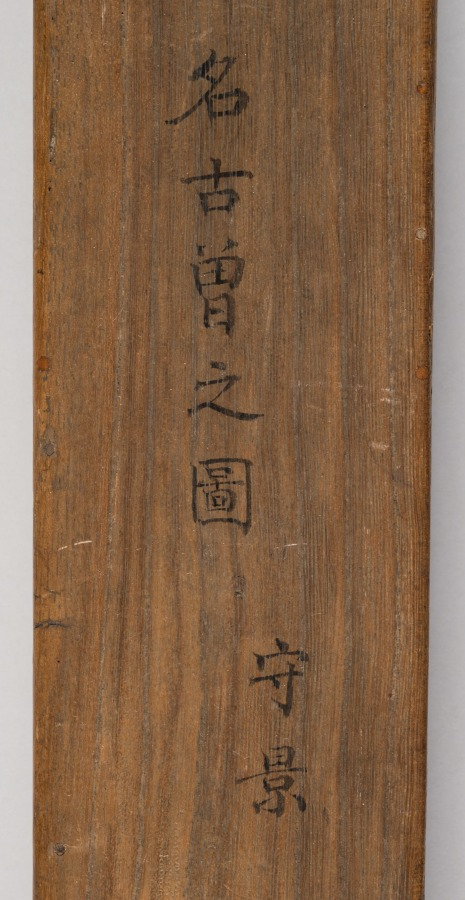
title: A Samurai on Horseback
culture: Japan, Edo period (1615–1868)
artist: Kusumi Morikage (Japanese, active c. 1620–1690)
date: mid- to late 1600s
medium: hanging scroll; ink and slight color on paper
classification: Painting